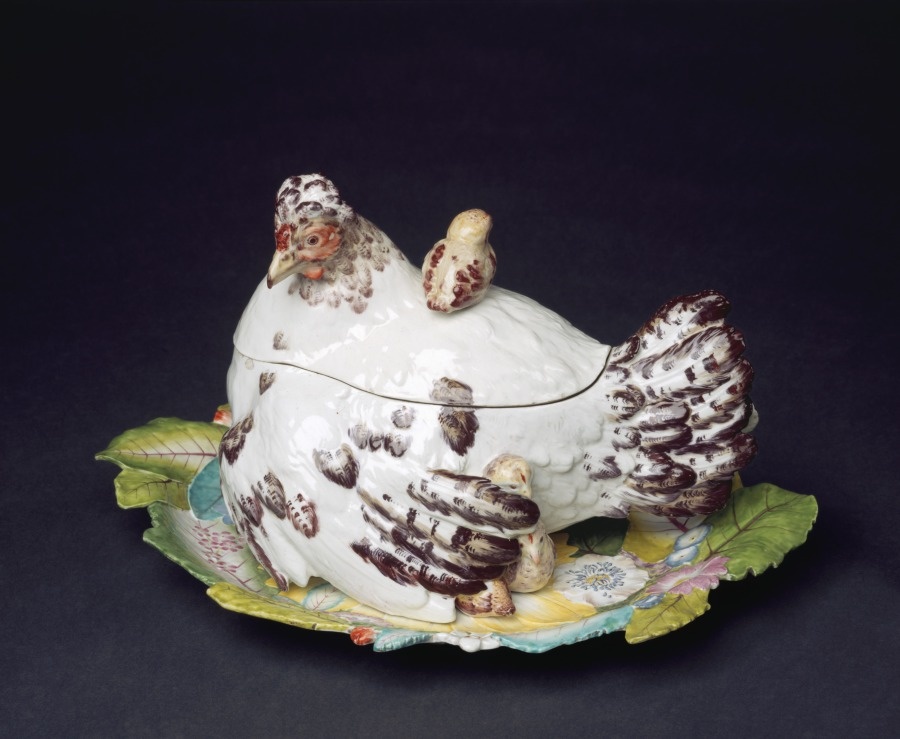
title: Hen and Chicks Covered Tureen on Stand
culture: England, London, Chelsea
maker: Chelsea Porcelain Factory (Britain, London, 1745–84)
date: c. 1755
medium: soft-paste porcelain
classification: Ceramic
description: The ceramic factory at Chelsea, located along the river Thames in western London, was Britain’s most renowned factory of decorative porcelain in the mid-1700s. Large tureens in the form of chickens or rabbits appealed to wealthy aristocrats, who took great care in developing specimen animal and poultry breeds on their country estates. The design for this particular tureen was taken from a popular seventeenth-century print by Francis Barlow depicting a farmyard.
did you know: Though the form of a soup tureen suggests a functional role at the dining table, such large, expensive porcelains were probably only used for decoration because hot liquids might have easily caused them to crack.